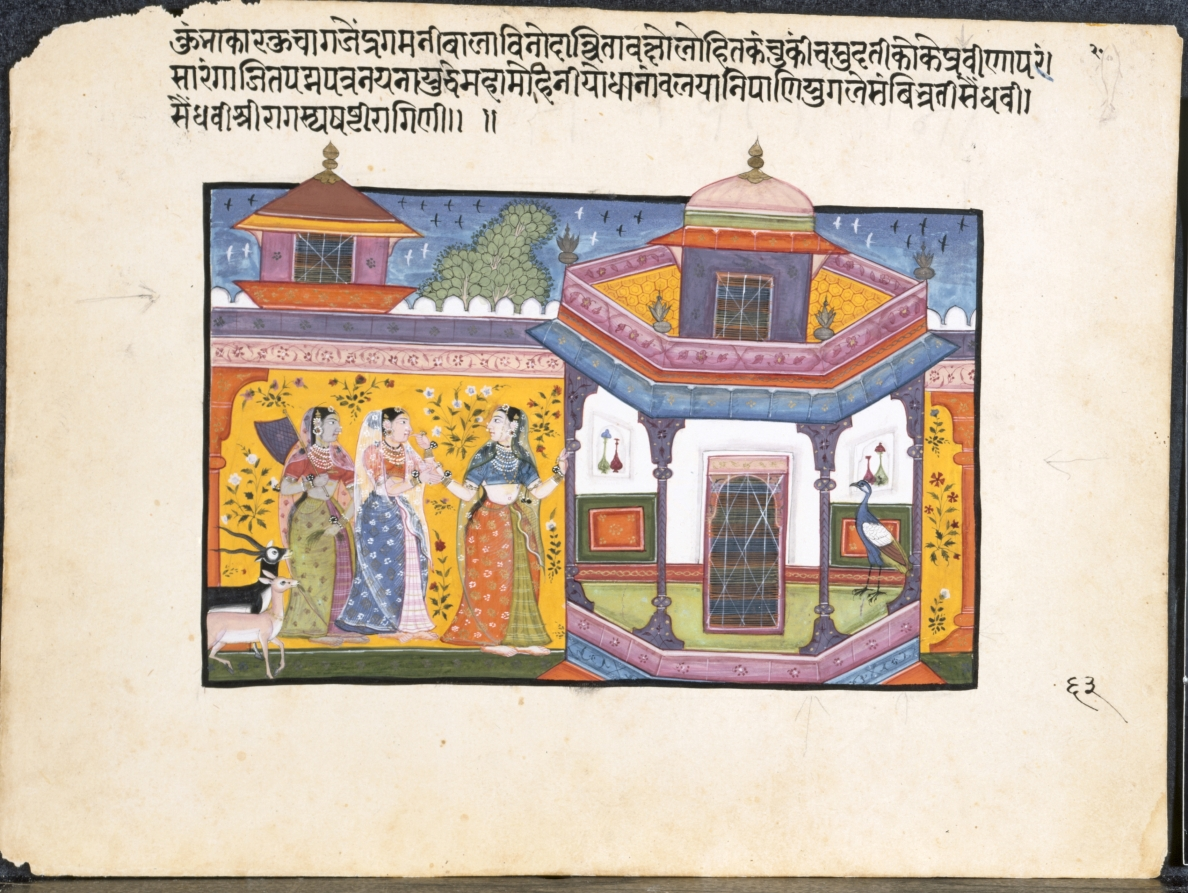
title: Saindhavi Ragini of the "Sri Raga" Family, page from a Ragamala Series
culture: India, Popular Mughal school, 17th century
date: 1600–1610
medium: Gum tempera, ink, and gold on paper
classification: Painting